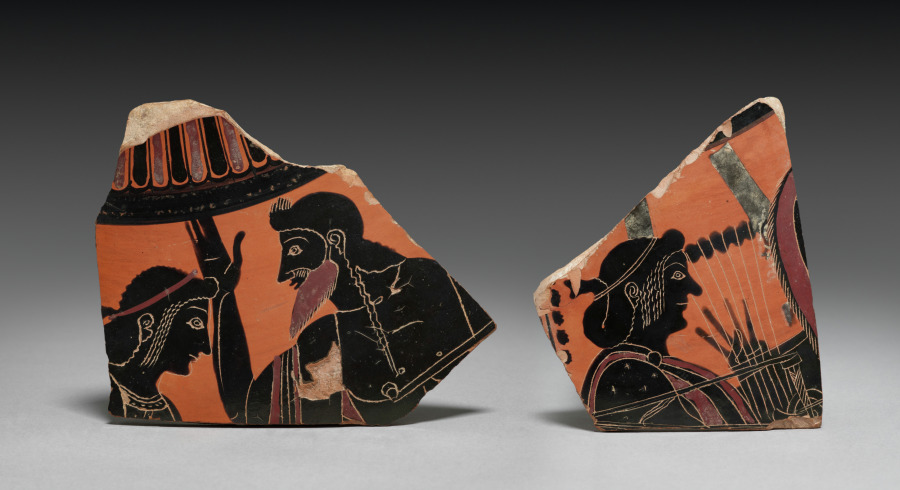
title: Fragment from Black-Figure Neck-Amphora of Panathenaic Shape (Storage Vessel): Apollo with Lyre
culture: Greek, Attic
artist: manner of Antimenes Painter (Greek, Attic, active c. 530–510 BCE)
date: c. 520 BCE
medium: ceramic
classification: Ceramic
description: With so little preserved, the precise subject once shown on this vase remains uncertain. Along with Apollo playing his lyre, parts of the mane and reins of a horse remain, suggesting a chariot procession—perhaps for the wedding of Peleus and Thetis, an event attended by the Olympian gods.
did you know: Although only two fragments survive from this vase, both show Apollo, here playing his lyre.